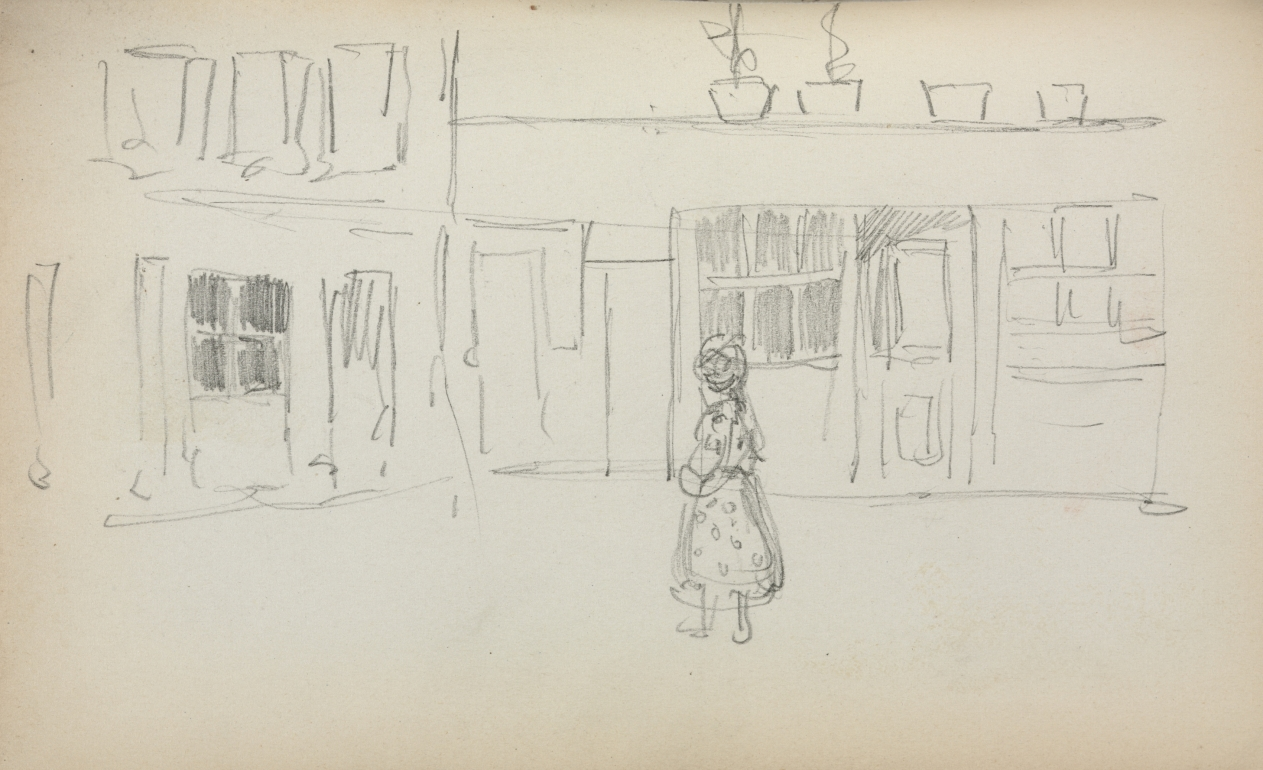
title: Italian Sketchbook: Street Scene with a Girl ( page 159)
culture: America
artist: Maurice Prendergast (American, born Newfoundland [now Canada], 1858–1924)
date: 1898–1899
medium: pencil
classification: Bound Volume